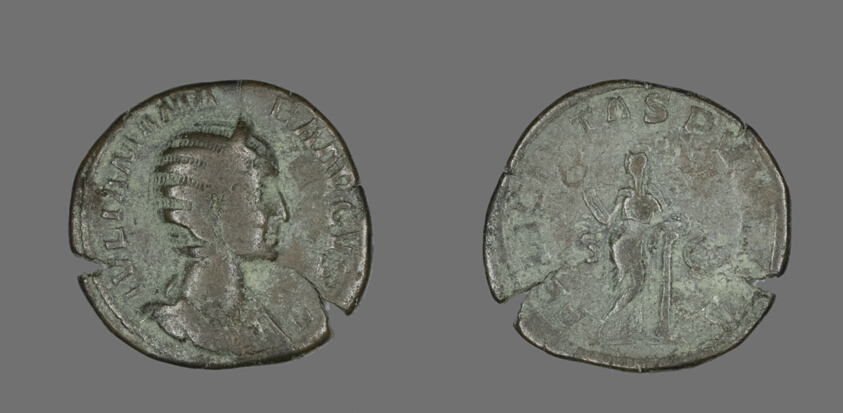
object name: Coin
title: Sestertius (Coin) Portraying Julia Mamaea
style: roman (ancient, style or period)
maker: Roman, minted in Rome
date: 235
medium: Bronze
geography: Roman Empire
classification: coin; ancient art